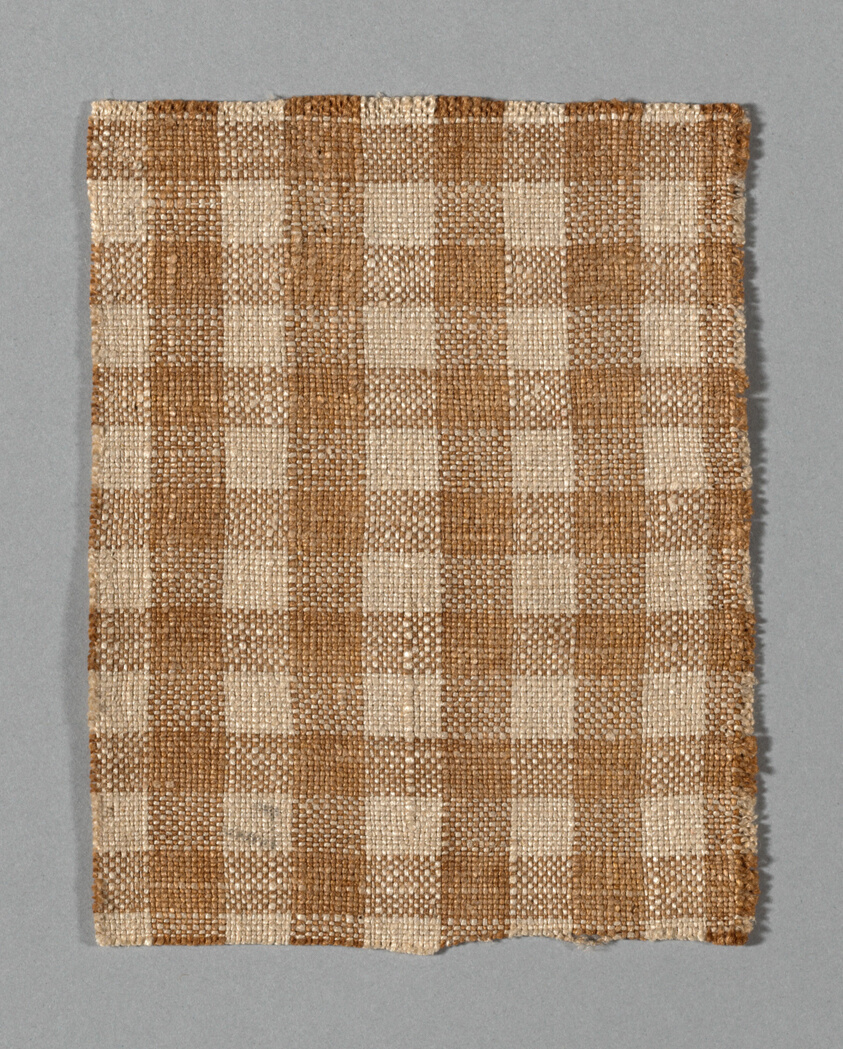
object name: Textile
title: Fragment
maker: United States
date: early 19th century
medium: Sample of stripe and check patterns of blue, white and tan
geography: United States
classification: textile; weaving